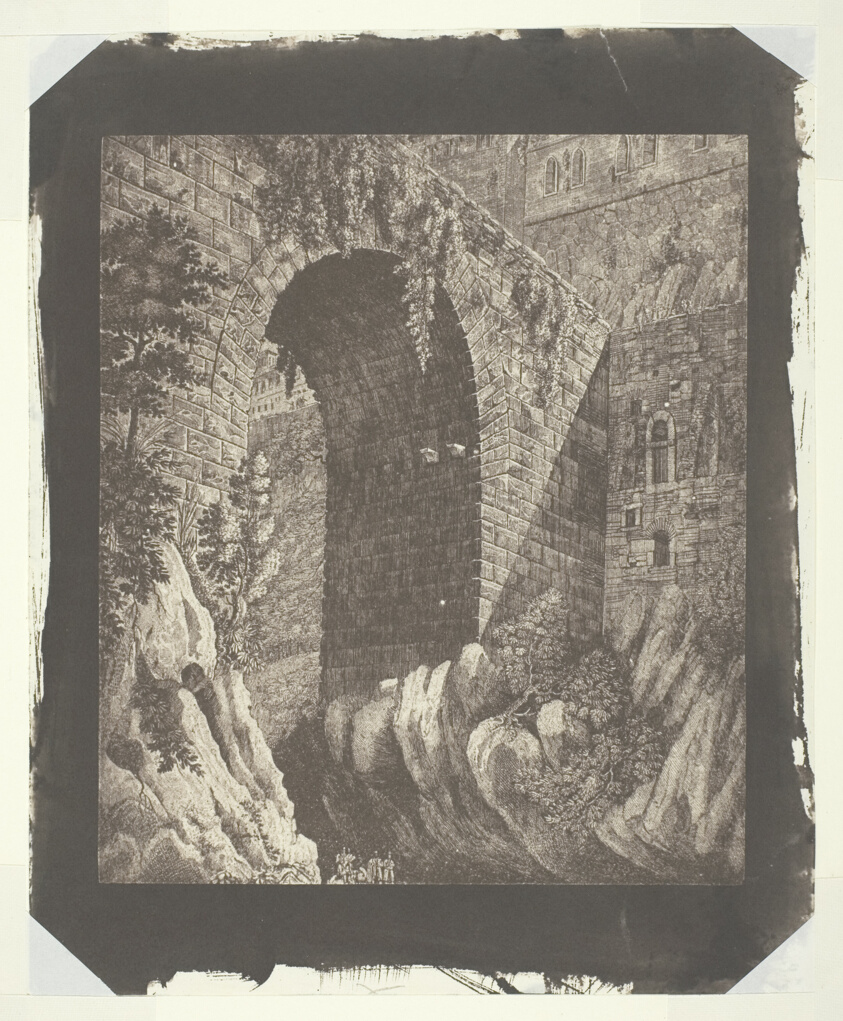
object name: Photograph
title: Copy of a Large Italian Print, Reduced in the Camera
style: 19th century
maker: William Henry Fox Talbot (English, 1800–1877)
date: c. 1840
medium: Salted paper print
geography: England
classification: salted paper print; photographic process; photography; photograph